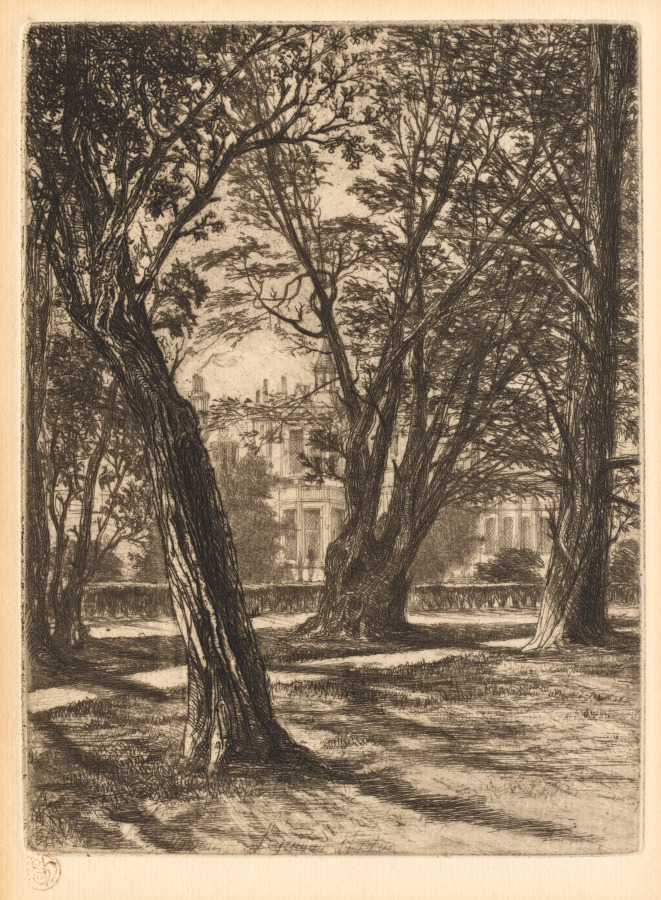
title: Kensington Gardens, No. 1 (Small Plate)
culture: England, 19th century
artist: Francis Seymour Haden (British, 1818–1910)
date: 1859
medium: etching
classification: Print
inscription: signed lower center in plate: Seymour Haden titled lower left in plate: Kensington